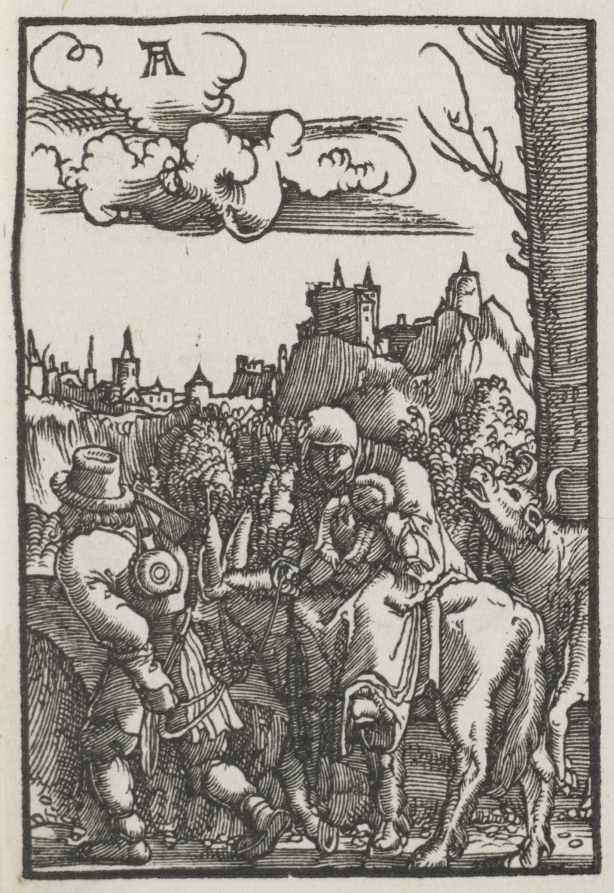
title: The Fall and Redemption of Man: The Flight into Egypt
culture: Germany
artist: Albrecht Altdorfer (German, c. 1480–1538)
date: c. 1515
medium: woodcut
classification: Print